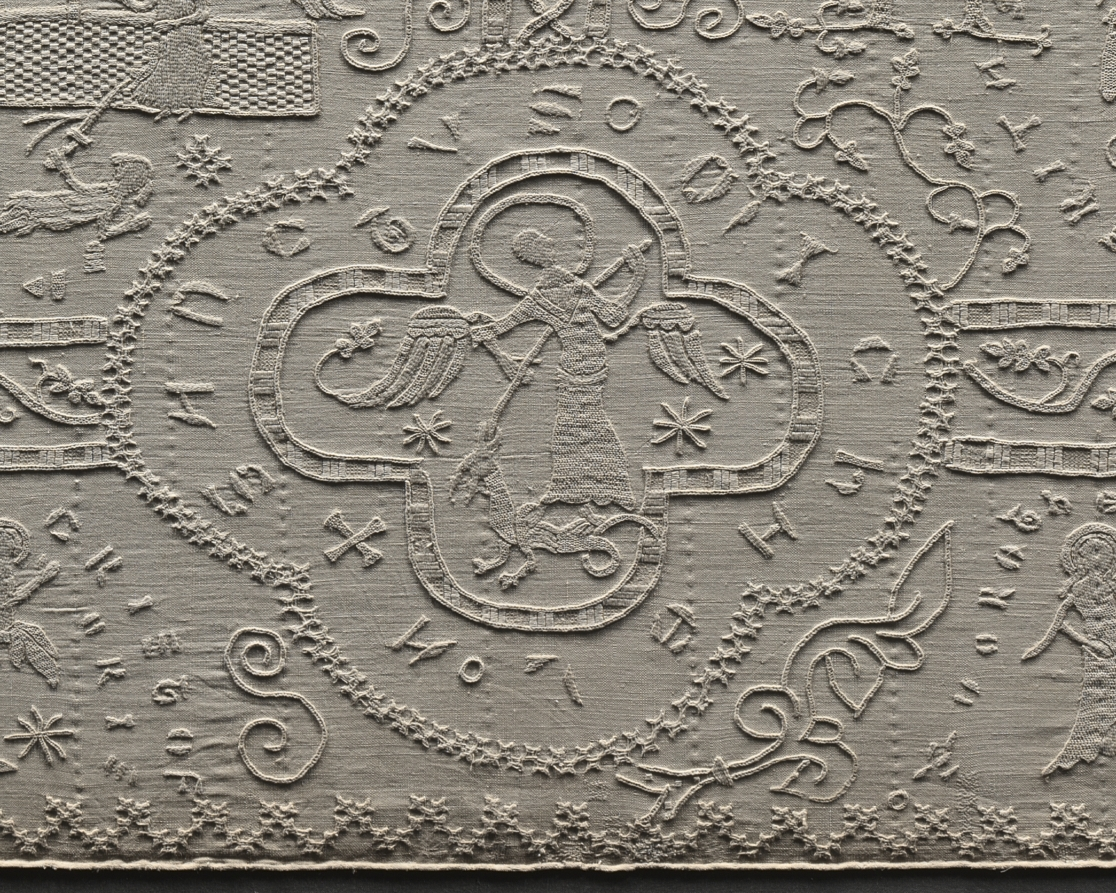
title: Altar Cloth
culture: Germany, Altenberg on the Lahn, Premonstratensian Convent, 14th century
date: c. 1350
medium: embroidery: linen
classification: Embroidery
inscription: various motifs enclosed in quatrefoils with identifying inscriptions in Gothic letters.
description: This large, embroidered altar cloth is one of the rarest, most important medieval church furnishings in existence. It was stitched by nuns in the Premonstratensian Convent in Altenberg on the Lahn River, north of Frankfurt, Germany, and was used to cover the church’s high altar in the weeks leading up to Easter. The cloth is an example of linen embroidery, a specialty of German nuns in the later Middle Ages. The Altenberg monastery church once had valuable furnishings; the high altar retable (a decorated frame with sculptures and paintings on the top of an altar) has survived, the main parts of which are now in the Städel Museum in Frankfurt, Germany.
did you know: When lit from behind, the previously hidden details emerge and the complex design becomes evident.